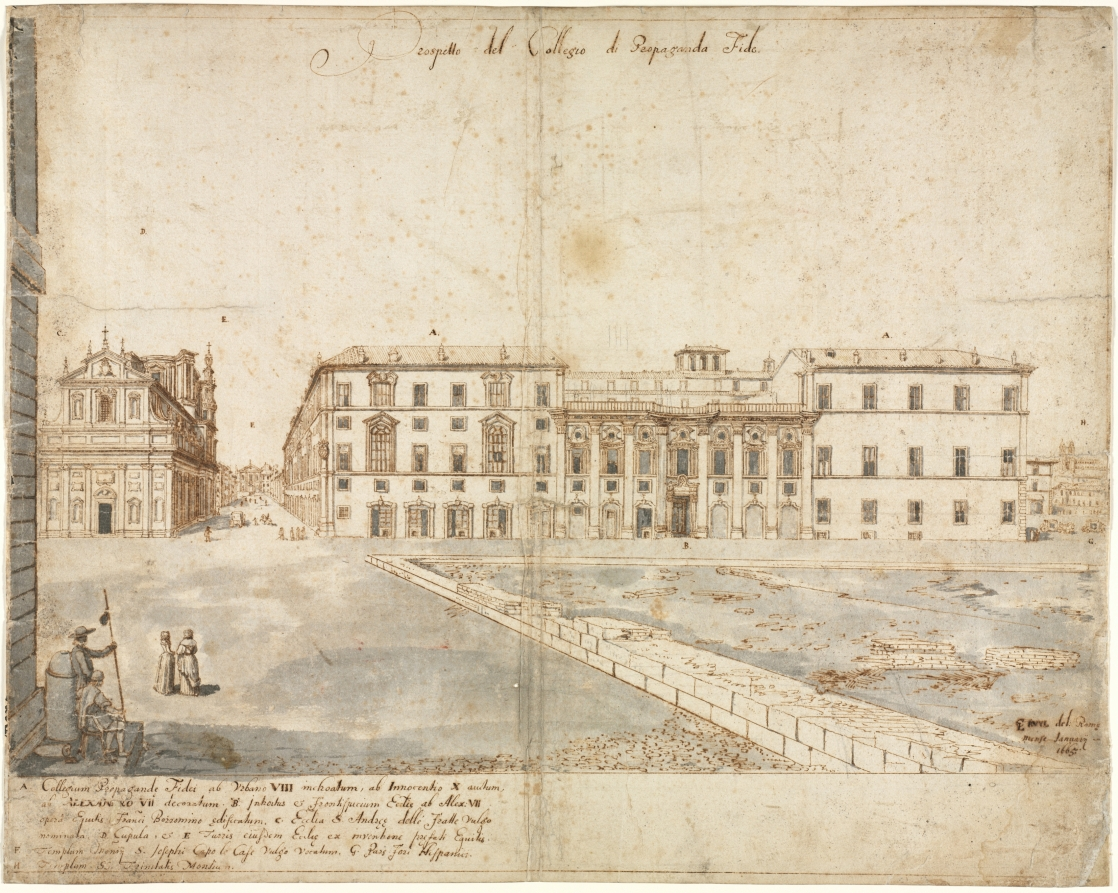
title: Eighteen Views of Rome: The Collegio di Propaganda Fide (recto)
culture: Flanders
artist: Lievin Cruyl (Flemish, c. 1640-c. 1720)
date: 1665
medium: pen and brown ink and brush and gray wash over graphite; framing lines in brown ink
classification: Drawing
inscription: signed, lower right, in brown ink: [artist's monogram: LC] RVYL del: Romæ / mense Januarij / 1665. ; by artist, upper center, in brown ink: Prospetto del Collegio di Propaganda Fide. ; by artist, throughout composition, in brown ink: [the letters A-H] ; by artist, lower left, in brown ink: A. Collegium Propagandæ Fidei ab Urbano VIII inchoatum, ab Innocentio X auctum, / ab ALEXAN[D]RO VII decoratum. B. Introitus et Frontispicium Eccliæ ab Alex: VII / operâ Equitis Frañci Borrommo edificatum. C. Ecclia S. Andreæ dellé Fratte vulgo / nominata. D. Cupula , et E Turris eiusdem Eccliæ ex inventione prefati Equitis. / F. Templum Mon~rij S. Josephi Capo le Case vulgo vocatum. G. Pars Fori Hispanici. H. Templum SS. Trinitiatis Montium.